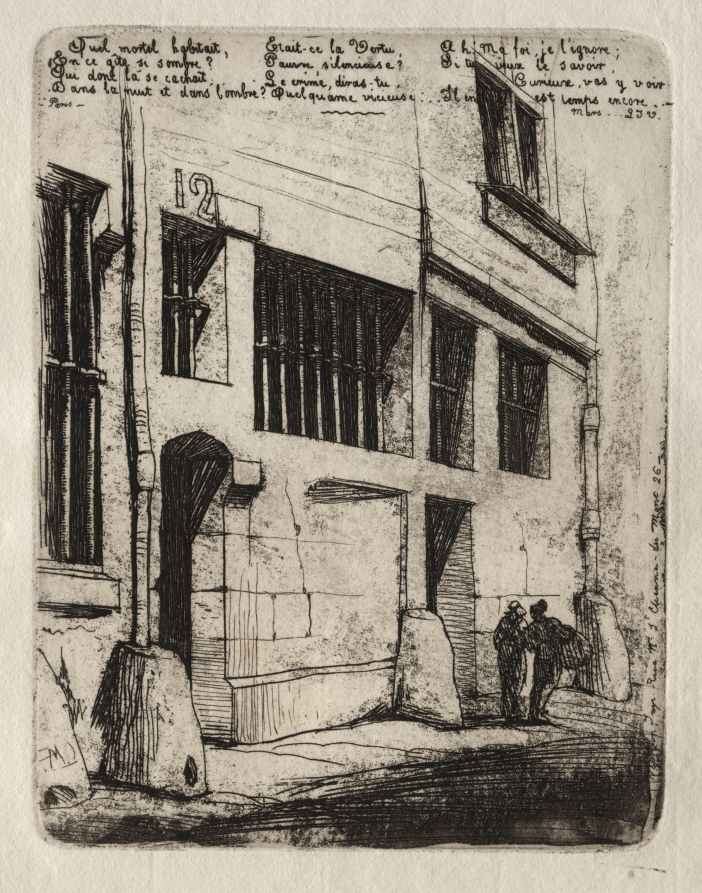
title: Etchings of Paris: The Street of the Bad Boys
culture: France, 19th century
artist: Charles Meryon (French, 1821–1868)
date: 1854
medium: etching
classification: Print